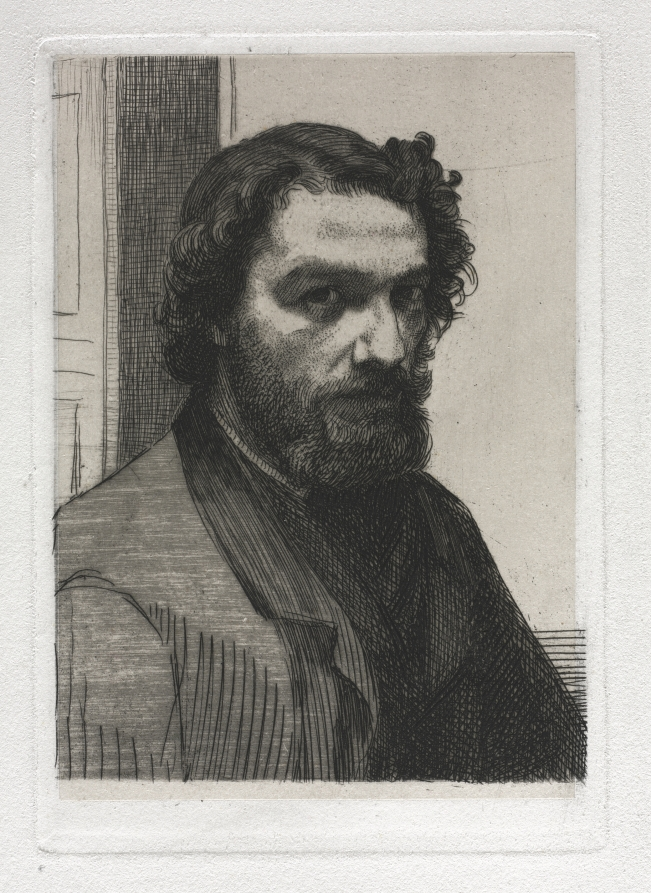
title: Alphonse Legros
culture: France, 19th century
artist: Félix Bracquemond (French, 1833–1914)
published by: Cadart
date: 1861 (printed 1875)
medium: etching on chine collé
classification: Print